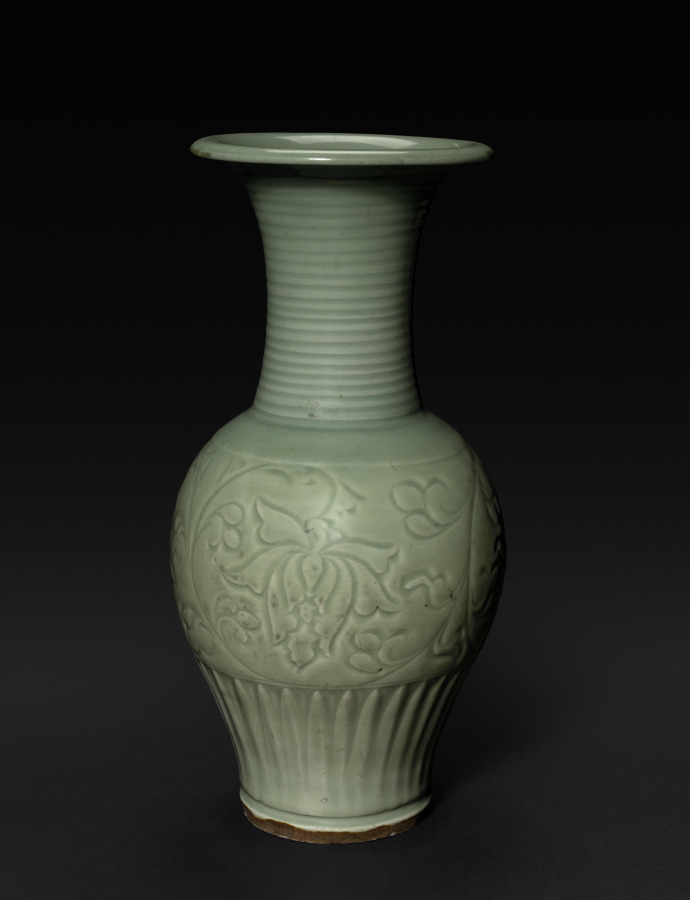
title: Vase: Celadon Ware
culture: China, Ming dynasty (1368–1644)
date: 1368–1644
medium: stoneware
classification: Ceramic